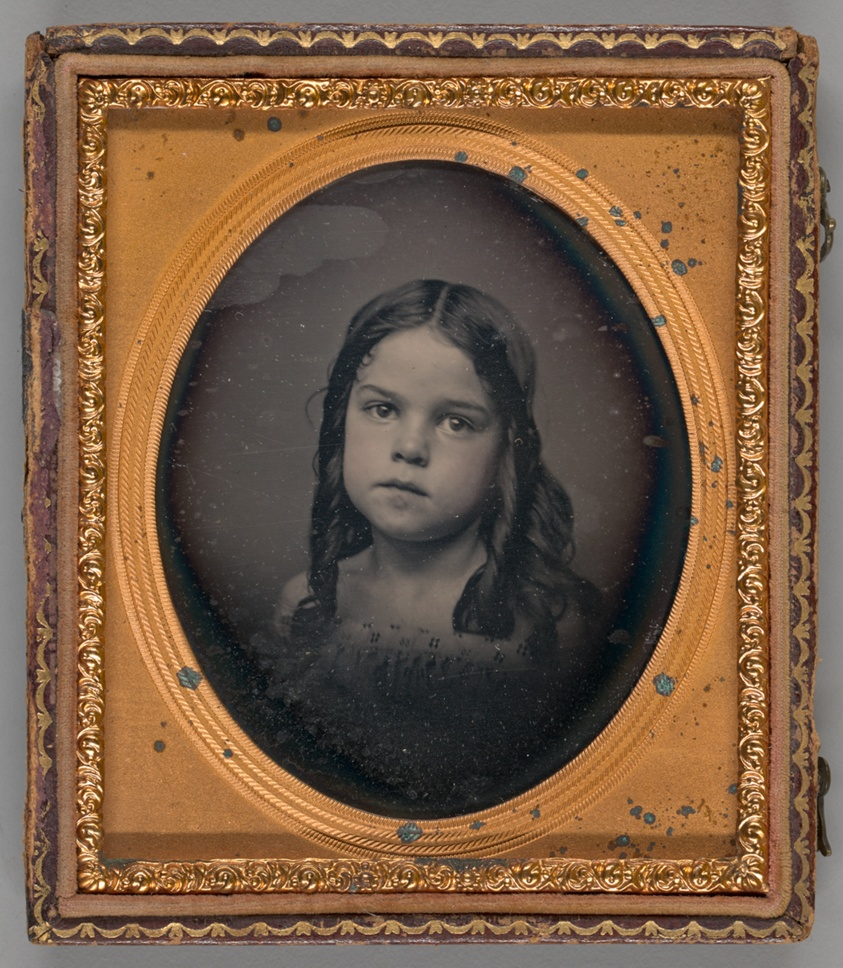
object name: Photograph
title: Untitled (Young Girl)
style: 19th century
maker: Artist unknown; 19th century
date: 1839/99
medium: Daguerreotype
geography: Unknown Place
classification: daguerreotype; photographic process; photography; photograph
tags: portraits, portraits: female subject, photography, formal portraits, portraits: child subject